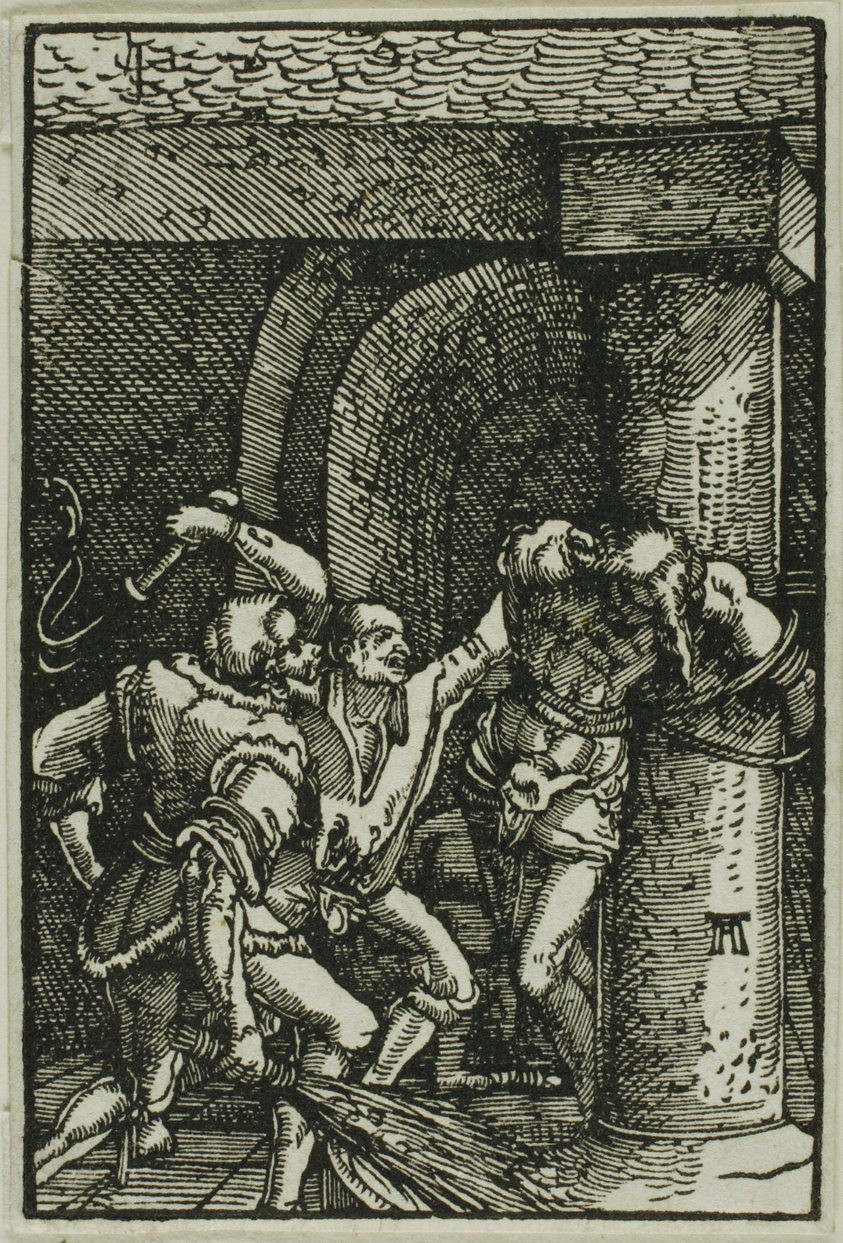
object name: Print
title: The Flagellation, from The Fall and Redemption of Man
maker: Albrecht Altdorfer (German, c.1480-1538)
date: 1513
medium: Woodcut in black on ivory laid paper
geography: Germany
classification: print; prints and drawing